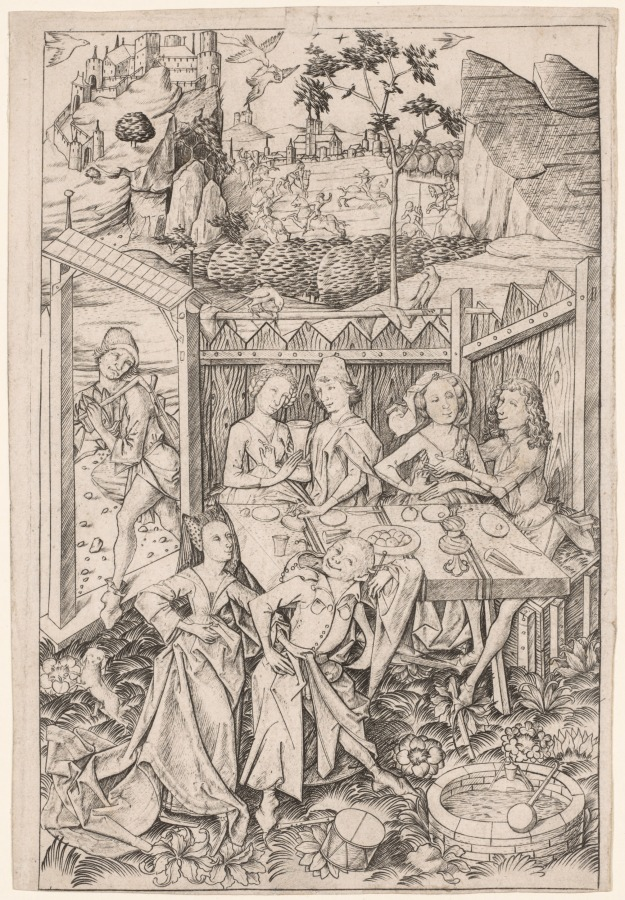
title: The Garden of Love (Large Plate)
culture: Germany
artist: Master ES (German, active 1450–67)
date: c. 1465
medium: engraving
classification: Print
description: Master ES’s action-packed scene presents a love garden before a landscape with knights playing jousting games. Love gardens were locales for displaying chaste love, but the behavior here, such as touching and wine drinking between couples at the table, indicates that their love is rather more physical. A traveling poet at the door brings musical enticements, and a man with a fool’s cap in the foreground signifies lust. The many birds throughout the scene refer to coupling, since “birding” was a euphemism for the sex act.